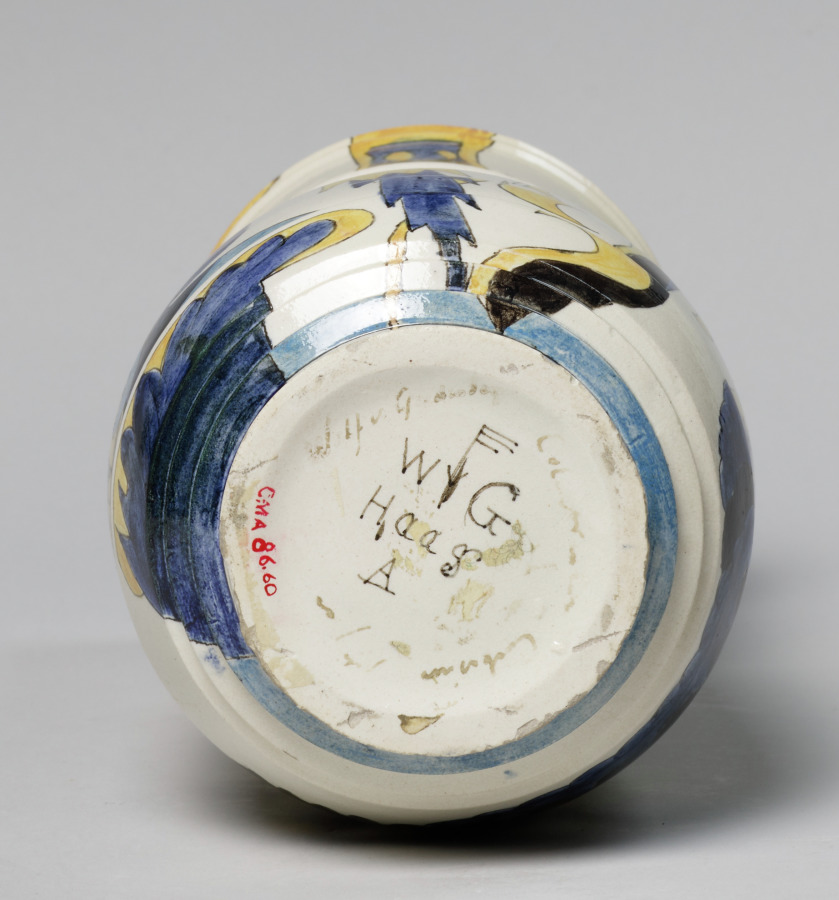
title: Jar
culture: Netherlands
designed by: Theodorus A. C. Colenbrander (Dutch, 1841–1930)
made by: Rozenburg Factory (Netherlandish)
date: 1885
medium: earthenware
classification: Ceramic